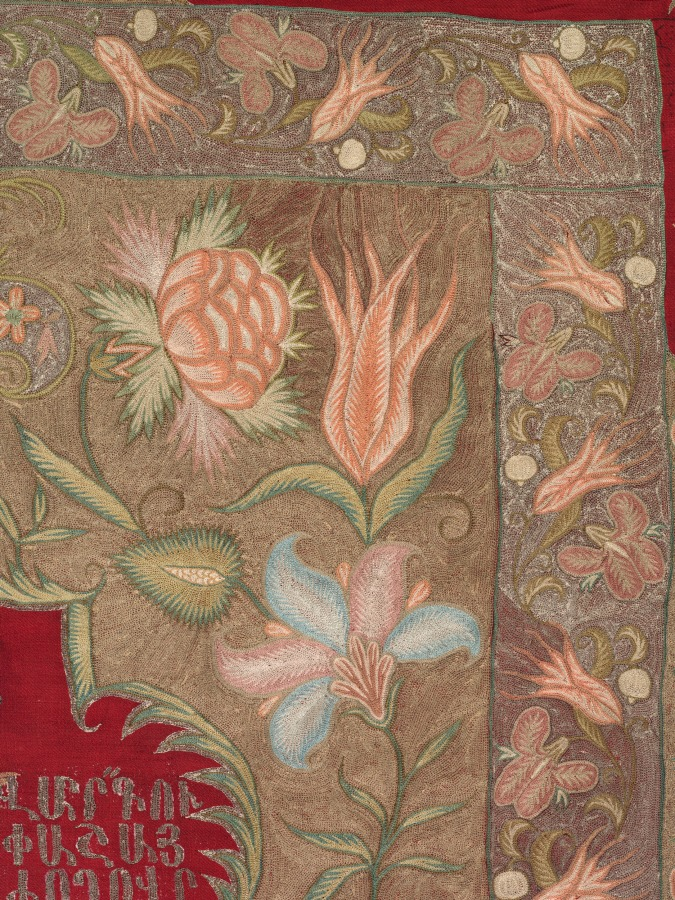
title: Embroidered Armenian liturgical curtain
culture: Turkey, Constantinople/Istanbul, Ottoman period (1299–1922)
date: 1763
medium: twill weave: wool; embroidery, chain stitch: silk, gilt- and silver-metal thread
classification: Textile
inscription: Inscription embroidered in erkatagir script with metal thread reads: "This curtain (varakouyr) is in memory of the people of Hassan Pasha Khan who gave it to the Monastery (vank) of Saint John the Baptist (Surp Garabed) on the Armenian date 10 May 1212 (1763 AD)."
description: This rare Ottoman embroidery features a floral bouquet that enriches the field under an elegant arch of gilt-metal thread. Flanked by vines of tulips and irises on a silver-metal-thread ground, vases of tulips and jonquils within cartouches adorn the main border and the well-turned corners, a sign of high quality. Dated 1763, the textile documents a mid-18th-century style and technique uncommon in Ottoman embroideries. The Armenian community commissioned this pattern for a liturgical curtain. Beneath the arch, Saint John the Baptist appears with a staff of victory, holding his own severed head in one arm and the Lamb of God in the other. The embroidered Armenian inscription reads: "This curtain is in memory of the people of Hassan Pasha Khan who gave it to the Monastery of Saint John the Baptist on the Armenian date 10 May 1212 [1763]."